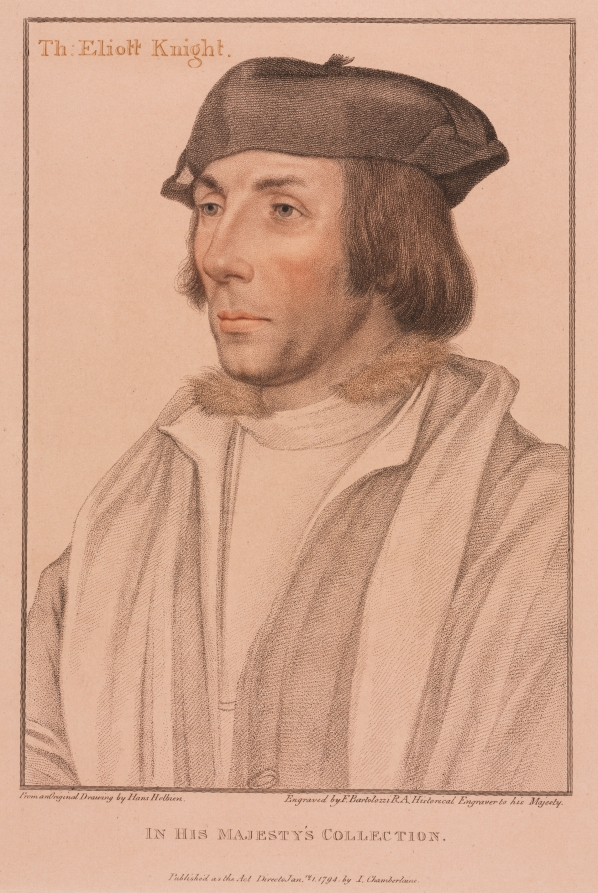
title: Sir Thomas Elyot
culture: England, 18th century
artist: Francesco Bartolozzi (British, 1727–1815)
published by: John Chamberlaine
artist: after Hans Holbein (German, c. 1465–1524)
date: 1794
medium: color stipple engraving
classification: Print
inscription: In pen and ink: "1794" On plate, upper left: "Th: Elioth Knight" On plate, below image: "From an Original Drawing by Hans Holbein Engraved by F. Bartolozzi R.A. Historical Engraver to his Majesty. / IN HIS MAJESTY'S COLLECTION. / Published as the Act Directs Jan.ry 1, 1794 by J. Chamberlaine"